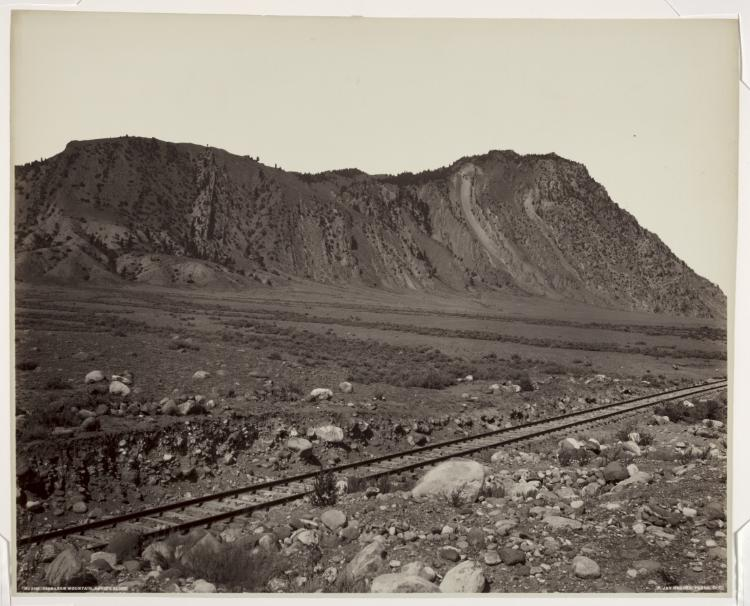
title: Cinnabar Mountain, Devil Slide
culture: America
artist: Frank Jay Haynes (American, 1853–1921)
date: 1880s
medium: albumen print from wet collodion negative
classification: Photograph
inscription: Written in negative: "No 3101 CINNABAR MOUNTAIN, DEVIL'S SLIDE / F. JAY HAYNES, FARGO, D.T."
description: A gifted photographer, both aesthetically and technically, Haynes skillfully composed the various elements in this mammoth plate print depicting an expansive, arid landscape with the Cinnabar Mountains in the background. Railroad tracks diagonally cross the composition, providing visual vitality and narrative richness. The large glass negative and albumen printing process allowed Haynes to convey the panoramic view with clarity and fidelity, while responding to the scene’s stunning natural illumination. Beginning in the late 1870s, this Michigan-born artist spent most of his impressive career documenting the entire Northwest as the official photographer for the Northern Pacific Railroad until 1905.